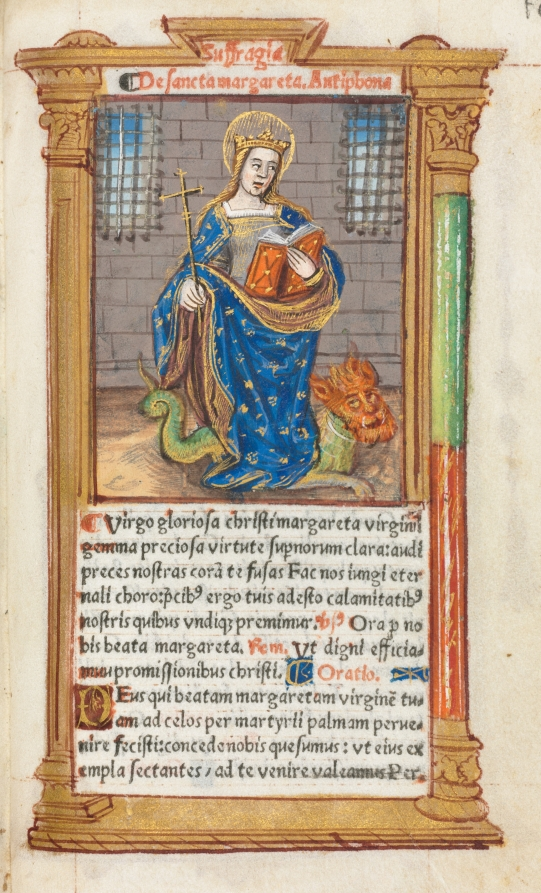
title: Printed Book of Hours (Use of Rome): fol. 110r, St. Margaret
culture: France, Paris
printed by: Guillaume Le Rouge (French, Paris, active 1493–1517)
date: 1510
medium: 112 Printed folios on parchment, bound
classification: Bound Volume